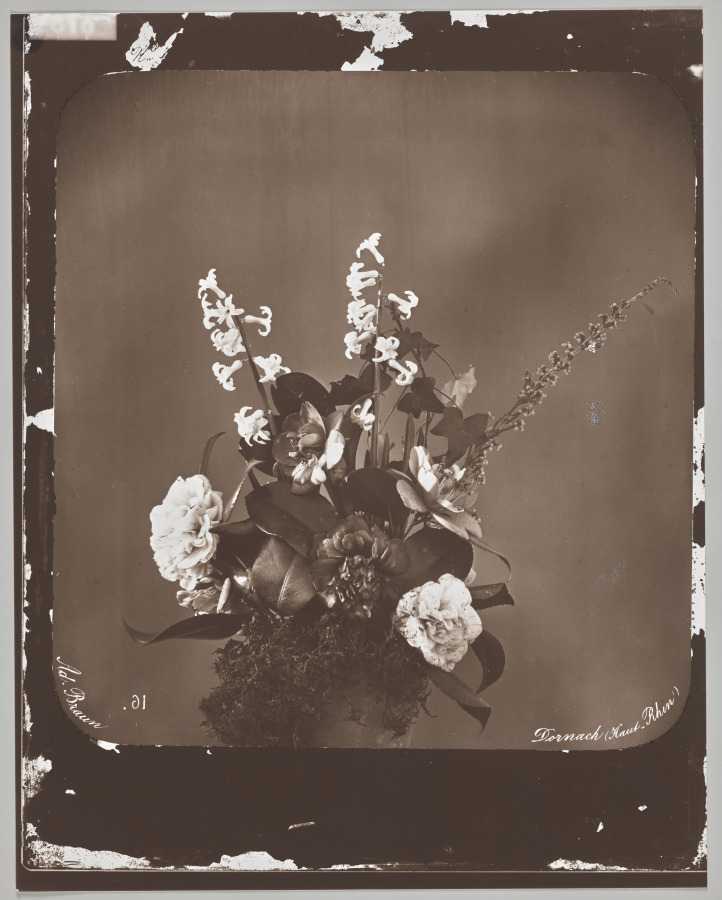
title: Untitled (flower arrangement)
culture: France, 19th century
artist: Adolphe Braun (French, 1812–1877)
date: Early 1850s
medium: albumen print or carbon print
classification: Photograph